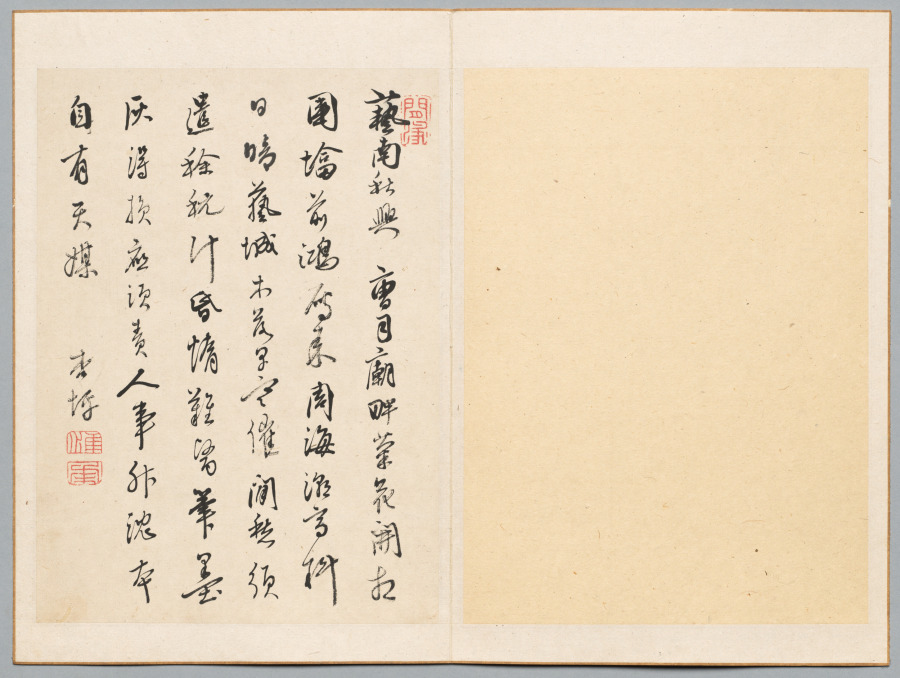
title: Poem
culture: Japan, Edo period (1615–1868)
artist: Rai Kyōhei (Japanese, 1756–1834)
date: late 1700s-early 1800s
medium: leaf from a pair of albums; ink on paper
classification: Portfolio